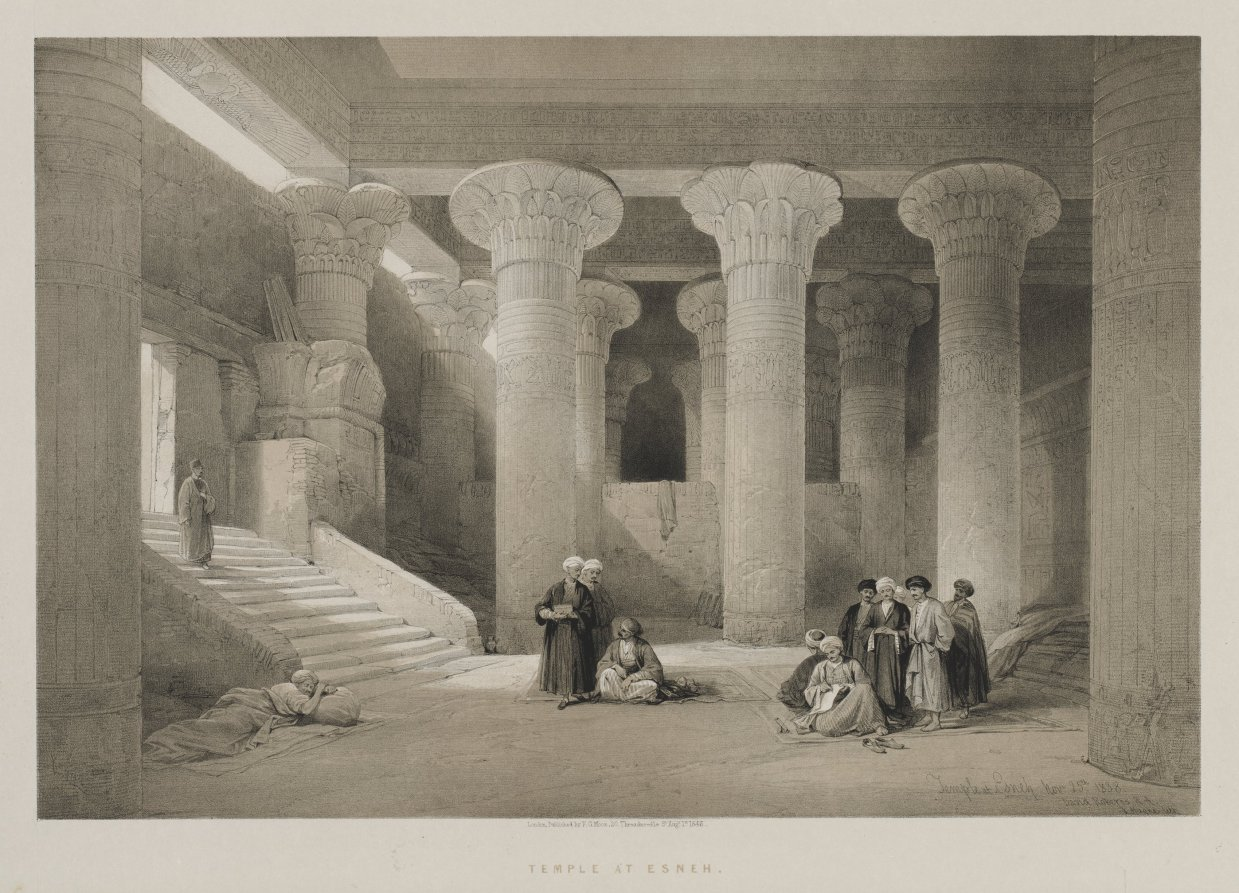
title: Egypt and Nubia, Volume I: Temple at Esneh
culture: England, 19th century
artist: Louis Haghe (British, 1806–1885)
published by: F. G. Moon, 20 Threadneedle Street, London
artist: after David Roberts (Scottish, 1796–1864)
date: 1846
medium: color lithograph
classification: Print